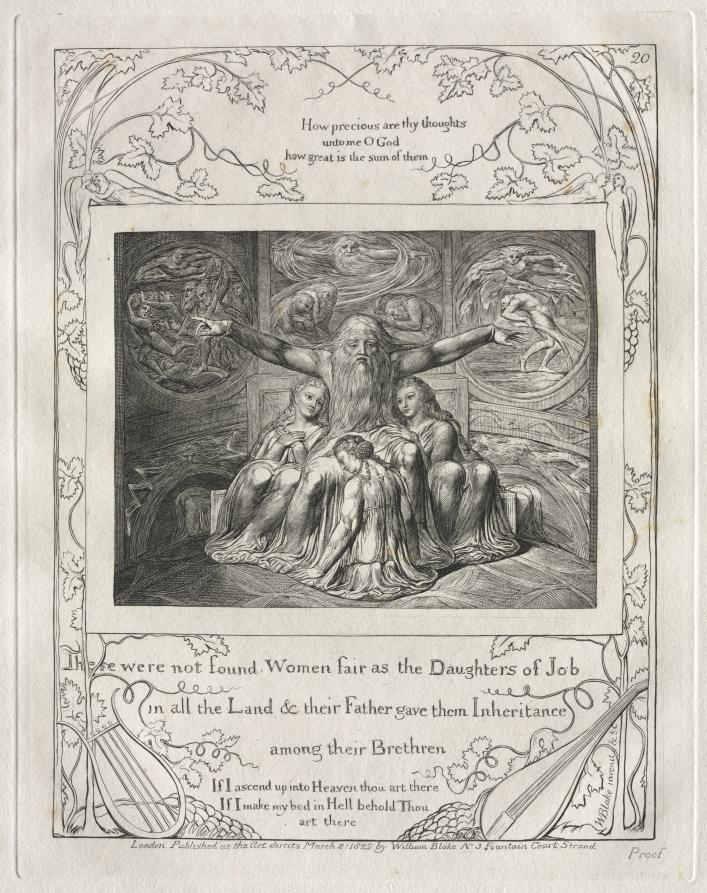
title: The Book of Job: Pl. 20, There were not found Women fair as the Daughters of Job / in all the Land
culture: England, 18th century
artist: William Blake (British, 1757–1827)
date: 1825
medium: engraving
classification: Portfolio